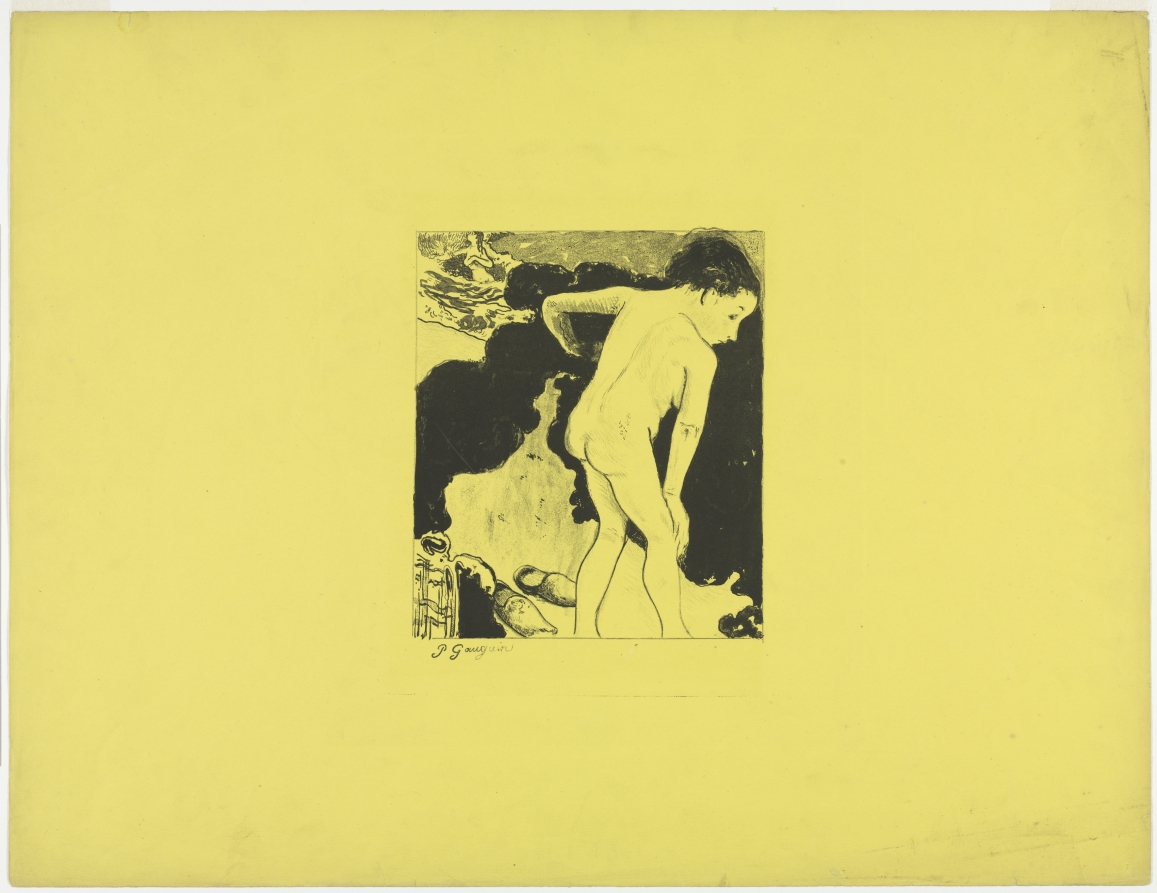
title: Volpini Suite: Breton Bathers (Baigneuses Bretonnes)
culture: France, 19th century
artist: Paul Gauguin (French, 1848–1903)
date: 1889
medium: zincograph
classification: Print